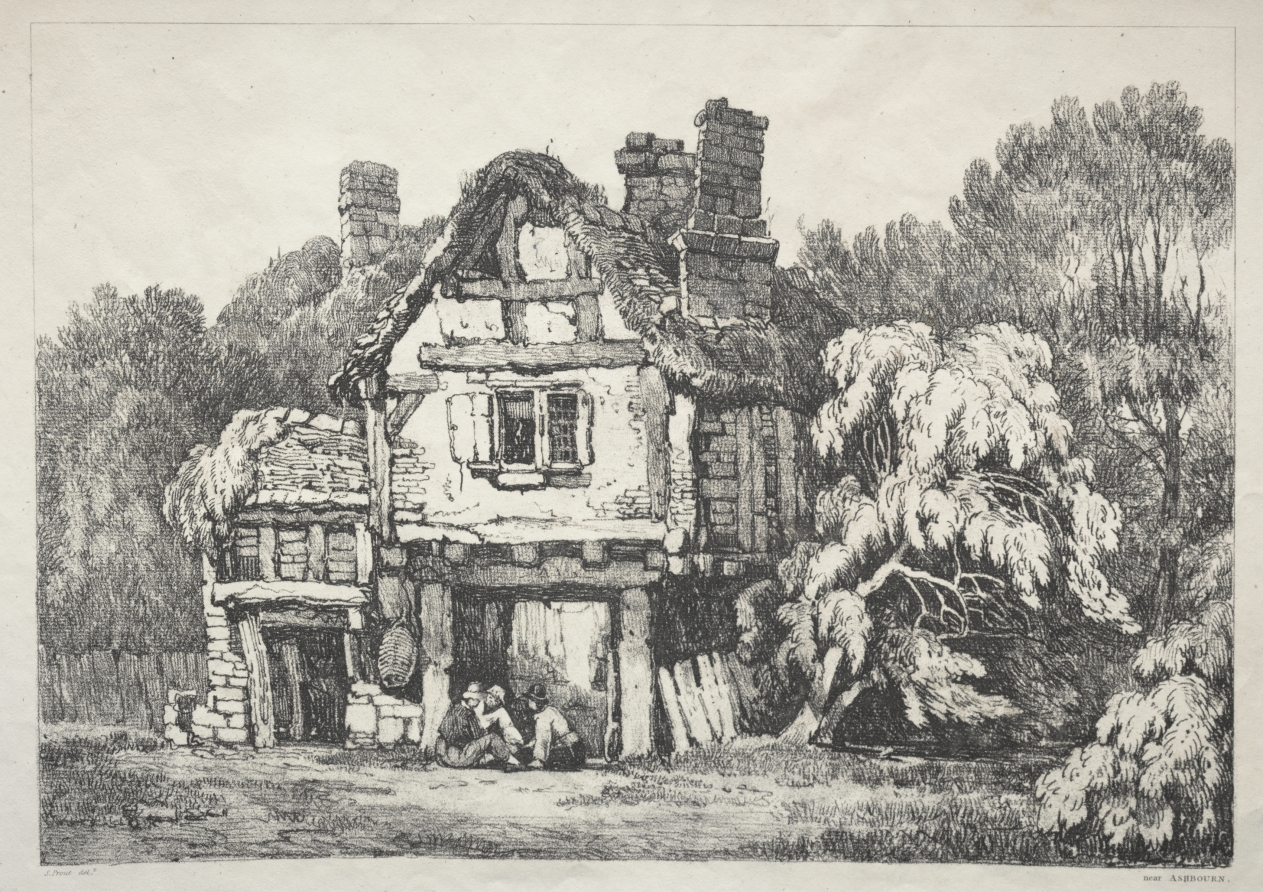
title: A Series of Ancient Buildings and Rural Cottages in the North of England: Near Ashbourn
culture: America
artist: Samuel Prout (British, 1783–1852)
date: 1821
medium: softground etching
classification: Print